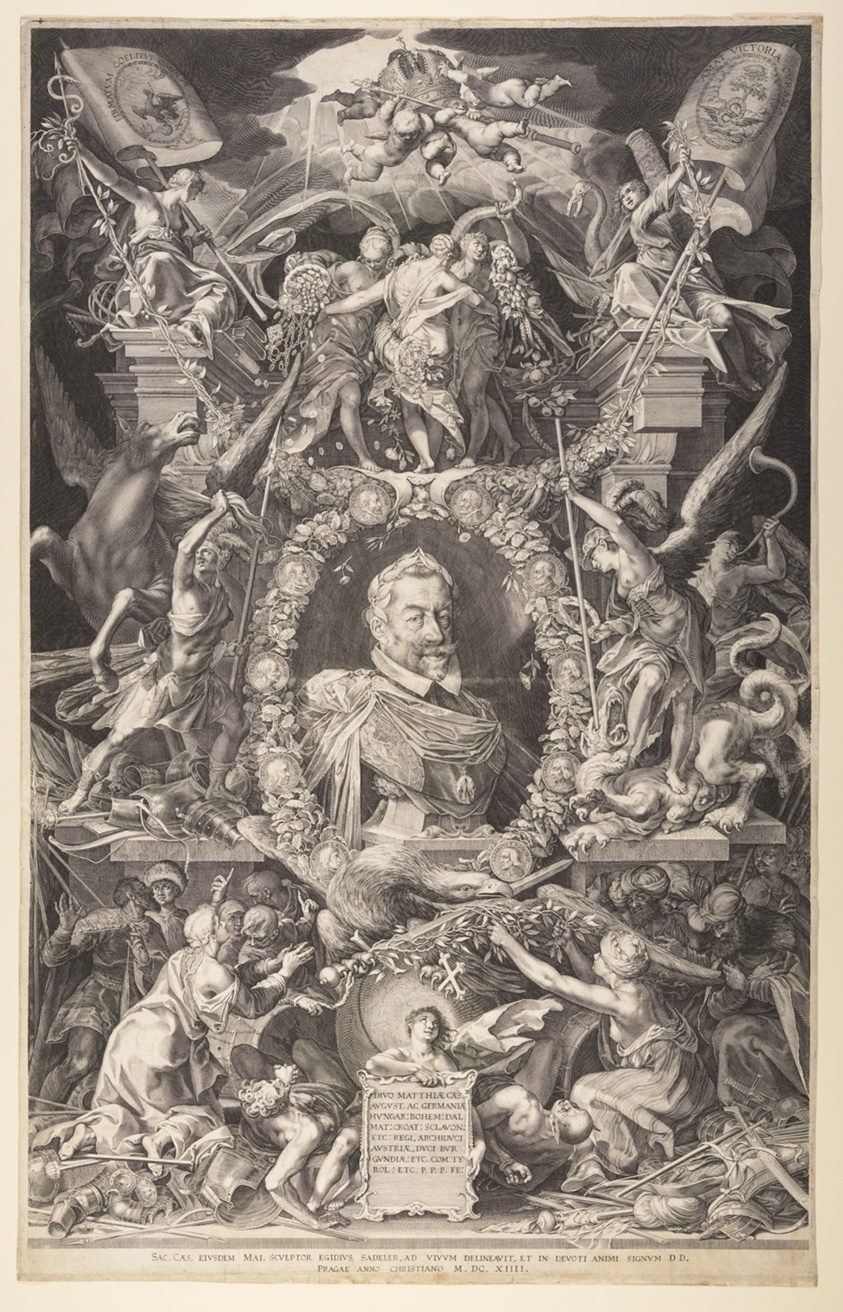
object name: Print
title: Emperor Matthias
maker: Aegidius Sadeler II; Flemish, c. 1570–1629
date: 1614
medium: Engraving on ivory laid paper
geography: Flanders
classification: engraving; paper; print; prints and drawing